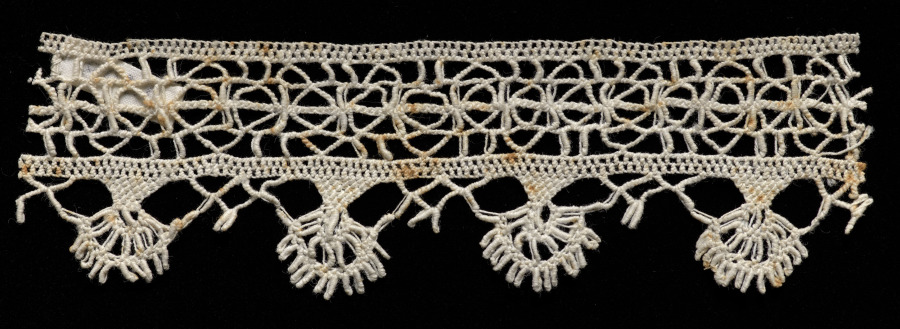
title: Lace Fragment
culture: Italy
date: 1600s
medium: Needle lace (punto avorio or ivory stitch) insertion and points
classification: Lace